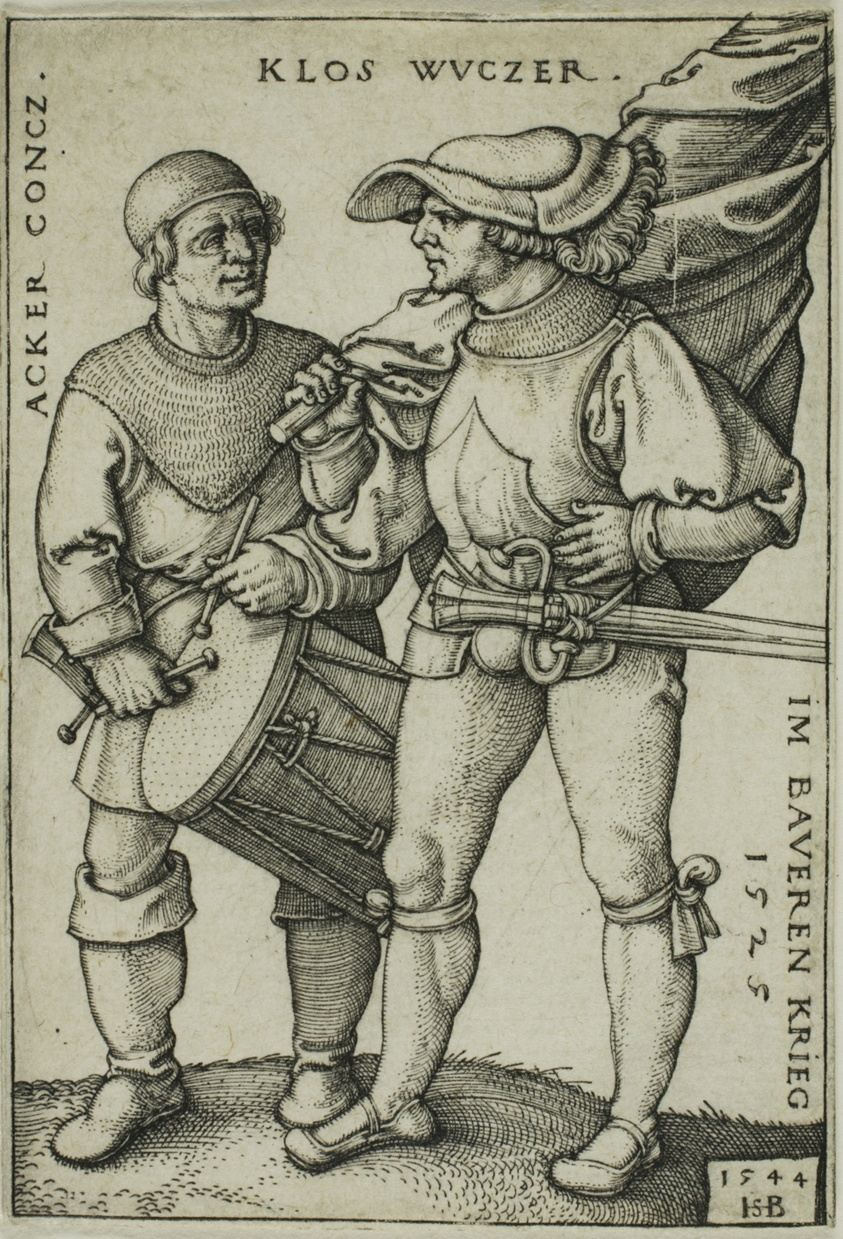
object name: Print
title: Standard-Bearer and Drummer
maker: Sebald Beham; German, 1500-1550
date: 1544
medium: Engraving in black on ivory laid paper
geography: Germany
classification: engraving; print; prints and drawing